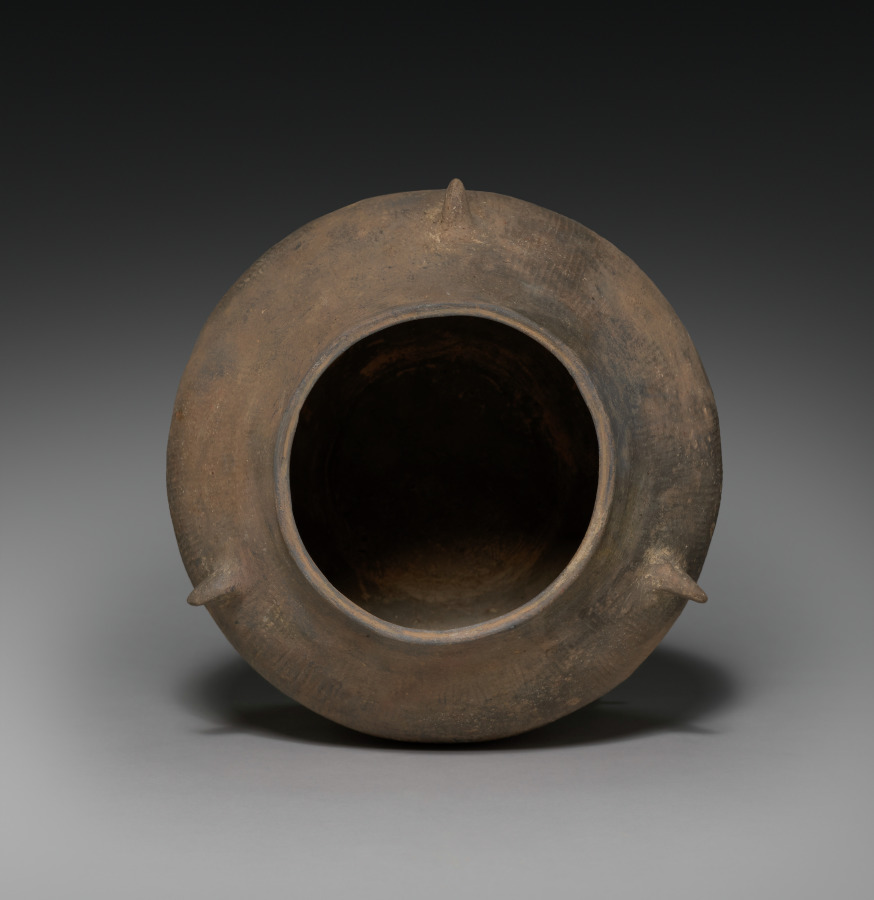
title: Lidded Jar with Four Horn Lugs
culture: Korea, Gaya period (42–562 CE)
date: 200s–400s CE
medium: earthenware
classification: Ceramic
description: Closed kilns built on hillsides became widely used for producing this type of pottery vessel in Korea during the Three Kingdoms period. Both its gray color and shimmering glaze are the result of the reduction of oxygen in the closed kiln chamber built on hillsides.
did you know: This pottery vessel served to contain cremated remains, indicating the popularity of Buddhist mortuary practice in Korea during the Three Kingdoms period.